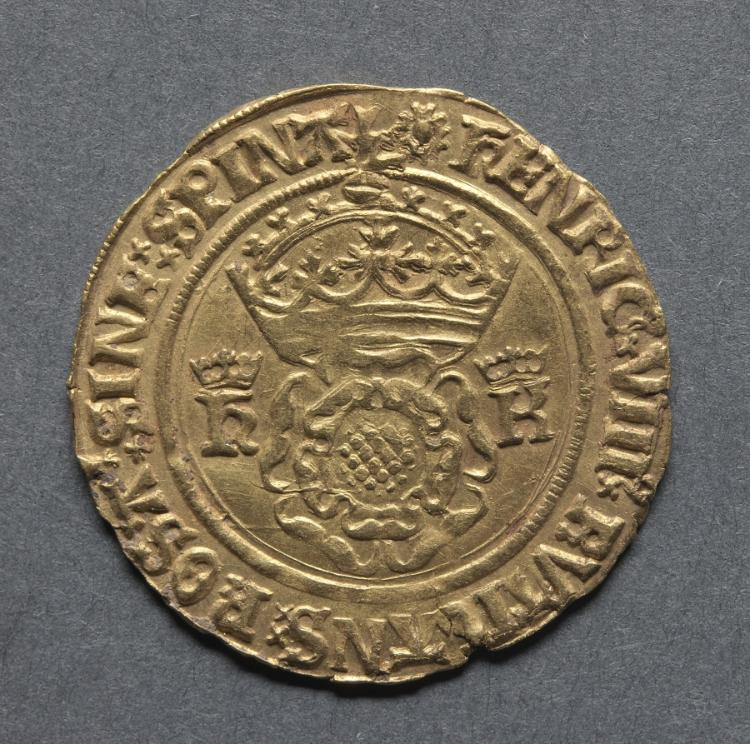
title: Crown of the Double Rose: Crowned Double Rose (obverse)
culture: England, Henry VIII, 1509-1547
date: 1526–1533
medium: gold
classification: Coins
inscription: HENRIC VIII RUTILANS ROSA SINE SPINE